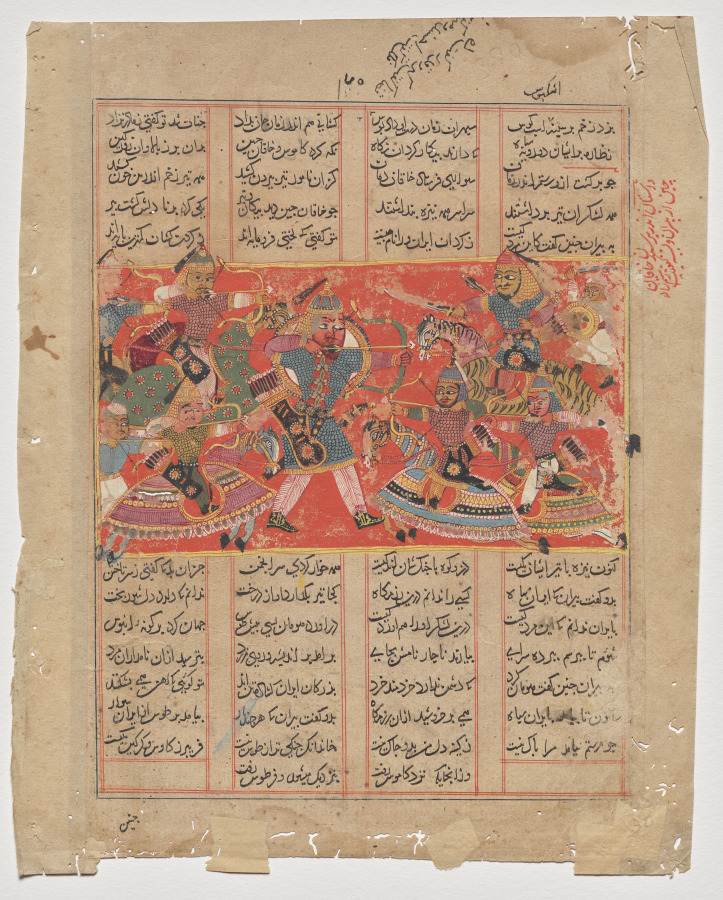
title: Rustam Takes Aim at Ashkabus, from a Shah-nama (Book of Kings)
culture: Sultanate India, Deccan or Malwa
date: c. 1425–50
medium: Gum tempera and ink on paper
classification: Painting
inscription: The heavens themselves echo the action of the arrow;/ Fate said “Take it!” and Fortune nodded “Give!”/ The Heavens cried, “Excellent!” and the Moon said “Well Done!”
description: The central warrior is Iran’s mythic hero Rustam, who approached an enemy army on foot, aiming to shoot the general off his mount. This page is from the oldest surviving illustrated Islamic manuscript made in India. The painting is by a local artist working for a Sultanate patron in India who admired Persian literature and emulated the erudite court culture of Iran.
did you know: In the upside-down inscription in the top margin: The Heavens cried, “Excellent!” and the Moon said “Well Done!”